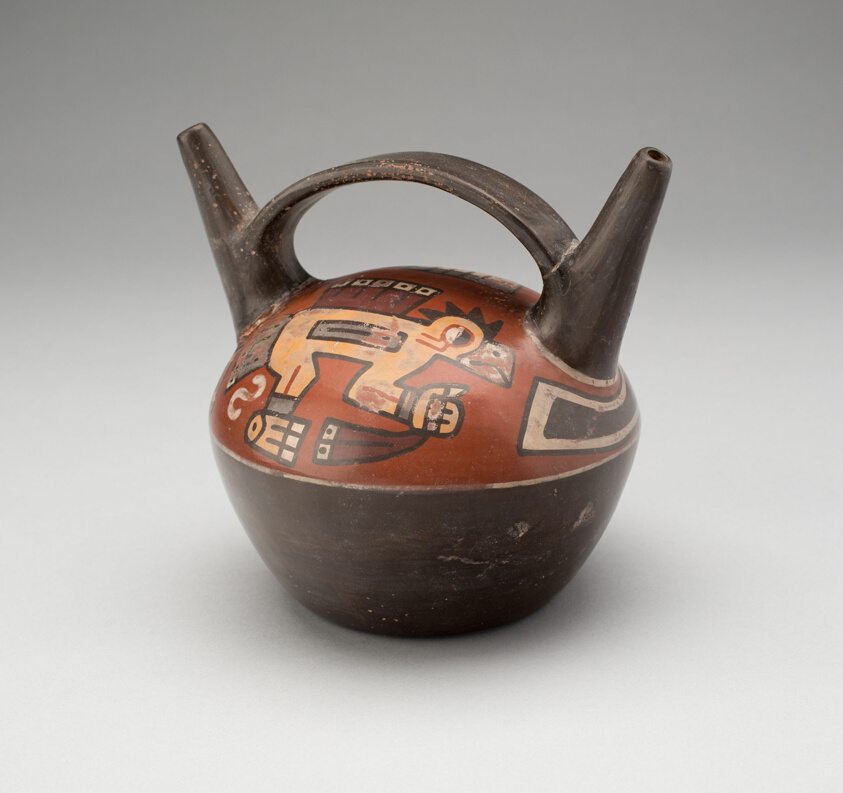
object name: Vessel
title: Vessel Depicting Abstract Birds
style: tiahuanaco, middle horizon, Pre-Columbian, americas, huari, andes, Arts of the Americas, andean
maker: Tiwanaku-Wari; South coast, Bolivia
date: 700–1000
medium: Ceramic and pigment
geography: Bolivia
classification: earthenware; ceramics; vessel; art of the americas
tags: abstract figures, birds